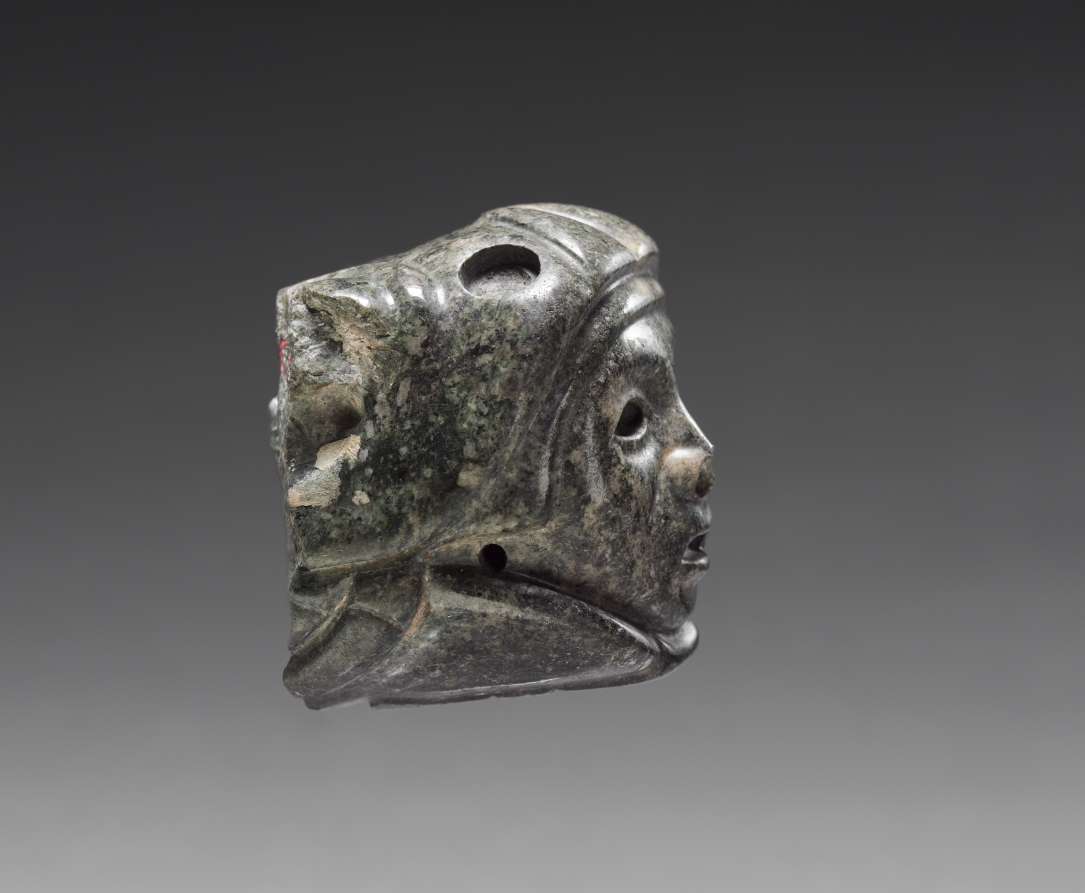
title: Head in Mouth of Snake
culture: Central Mexico, Aztec, Post-Classic Period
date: 1325–1519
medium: greenstone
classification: Stone